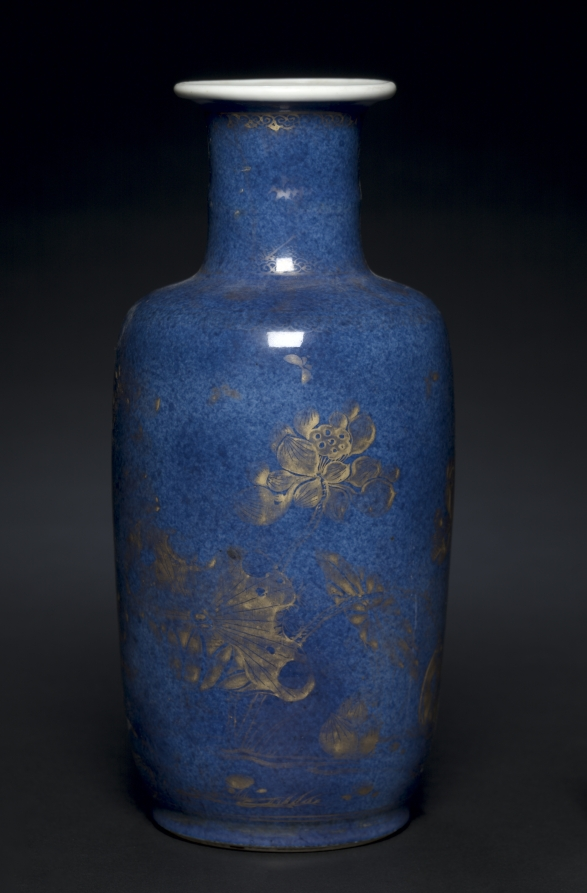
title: Vase with Lotus Plants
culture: China, Qing dynasty (1644-1911), Kangxi reign (1661-1722)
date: 1662–1722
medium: porcelain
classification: Ceramic